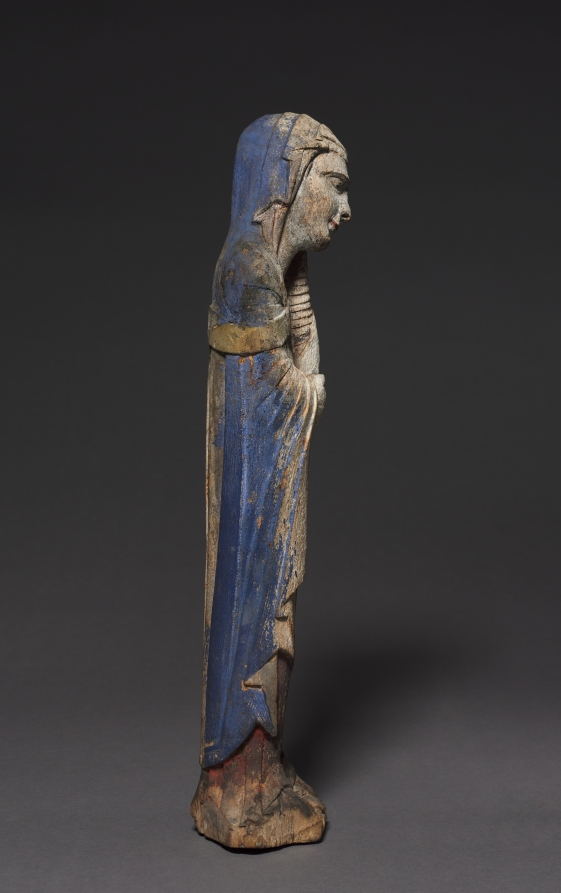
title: Mourning Virgin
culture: Austria, Region of Salzburg, Lungau?, 13th century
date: c. 1240–1260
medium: painted wood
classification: Sculpture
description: These traditional devotional figures at one time formed a Crucifixion group with a Crucified Christ (now lost). The ensemble may have been mounted high above the entrance to the sanctuary of a church on a barrier called a rood beam, beyond which lay people were not allowed. Crucifixion groups were common in medieval churches where they symbolized the sacrifice and real presence of Christ in the Mass.